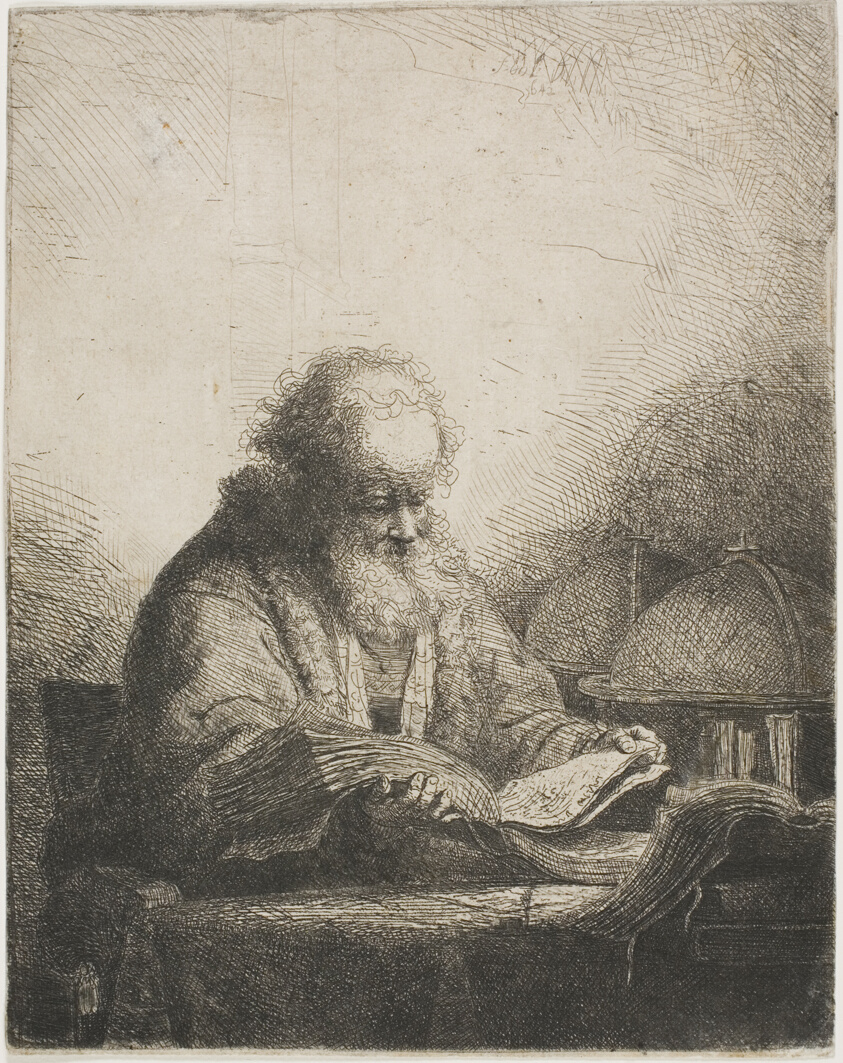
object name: Print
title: The Philosopher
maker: Ferdinand Bol (Dutch, 1616-1680)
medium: Etching on paper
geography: Holland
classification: etching; print; prints and drawing